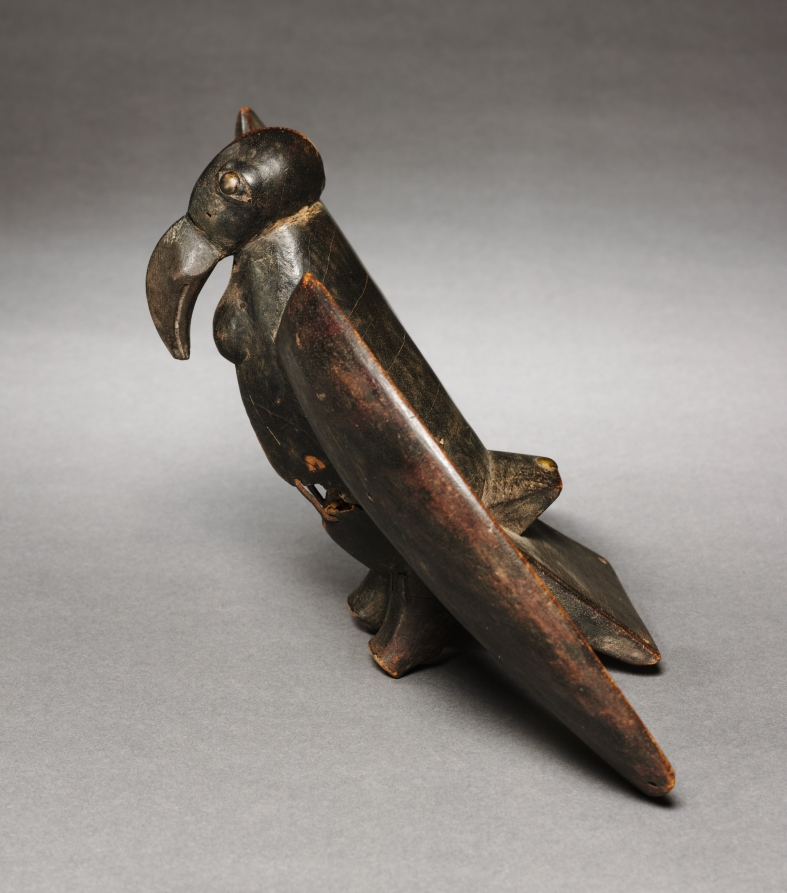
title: Bird Standard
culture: Africa, West Africa, Côte d'Ivoire, Senufo-style carver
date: early to mid-1900s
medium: Wood and upholstery studs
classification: Sculpture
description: An eagle depicted in flight originally surmounting a long staff, the bird standard is offered to the winner of a hoeing contest between young men. The competition is not only meant to promote social cohesion and solidarity, it also serves to encourage fertility. Honoring the endurance of a victorious farmer, such a bird standard is also used as a display sculpture during the funeral of a former champion or a member of his courtyard or family unit.